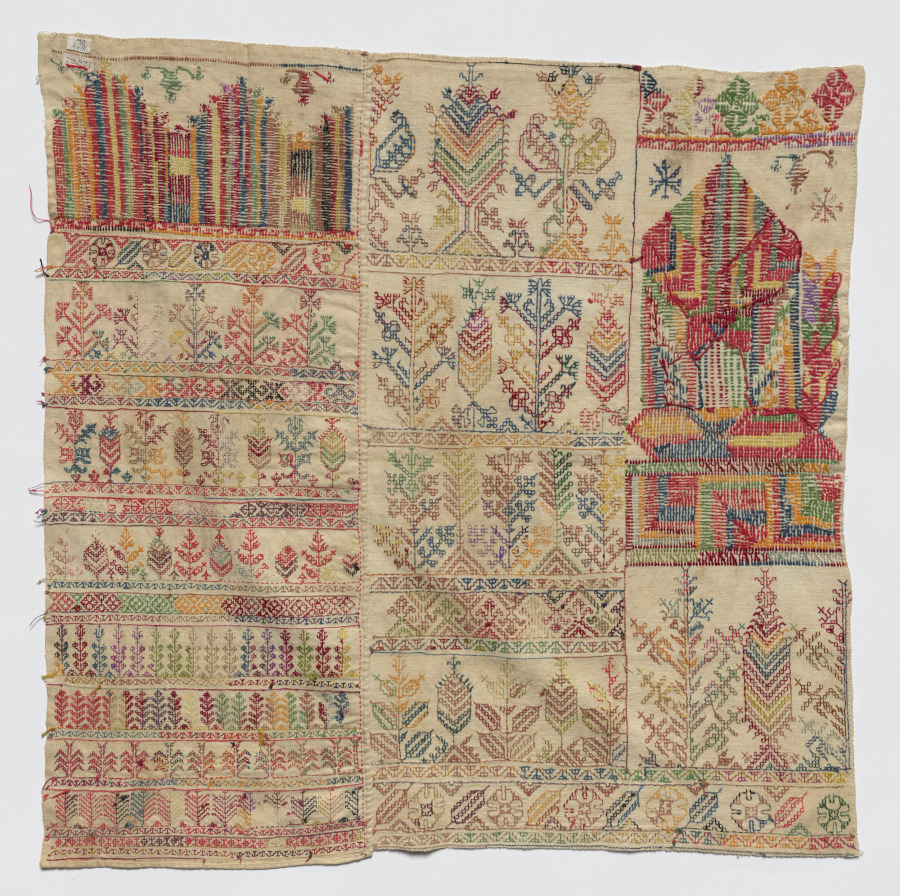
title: Embroidery sampler (chelliga/shelliga)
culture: Africa, North Africa, Morocco, Moroccan embroiderer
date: c. 1700s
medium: Cotton, silk, dye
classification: Sampler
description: These detailed samplers demonstrate the artist's technical range. Here, floral designs, protective open-palm hand motifs (khamsa) and various patterns are embroidered using double-running stitches, straight stitches, and long-armed cross stitches with dyed silk thread. Young women from all social classes would learn these skills from a master craftswoman (mu'allima), who taught within her home.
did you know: Upon completing their training, professionally-trained young women would produce a sampler as a "diploma" testifying to their embroidery skills.